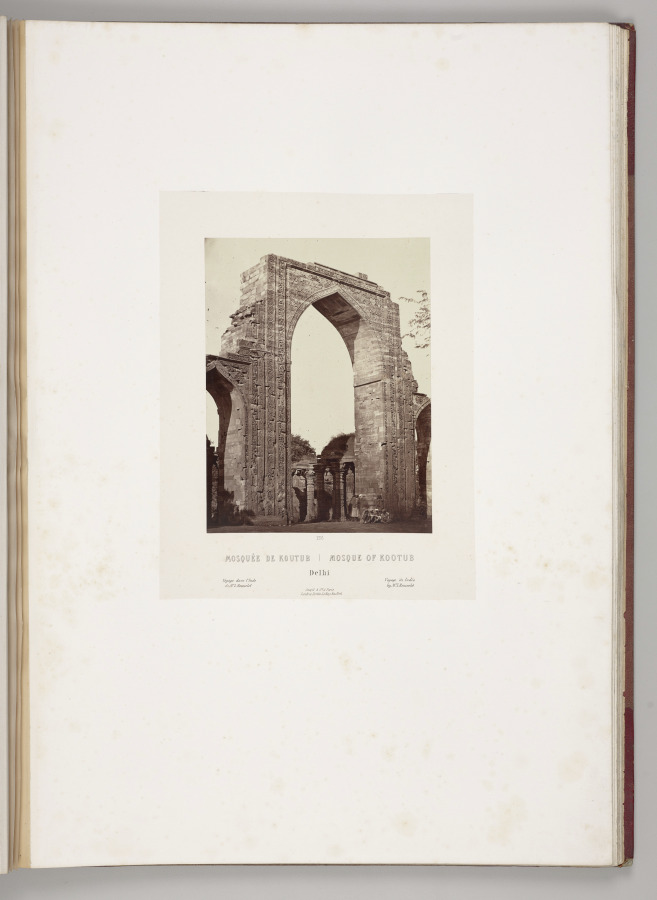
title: Mosque of Kootub, Delhi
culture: France, 19th century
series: India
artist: Louis-Théophile Marie Rousselet (French, 1845–1929)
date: 1865–68, published 1869–70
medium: Albumen print from glass plate negative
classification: Photograph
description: Concerned that his drawings did not do justice to the splendor of India’s monuments, Rousselet learned photography in India that year, a remarkable accomplishment. He proved to be a talented photographer with a sophisticated sense of composition. The scenes in this volume sweep across sites of Sultanate, Rajput, and Mughal power in northern India, from the sacred Hindu city of Varanasi on the Ganges River to Alwar in Rajasthan. Also included are several scenes of industry and portraits of Indian rulers.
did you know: Louis Rousselet described himself as a “scientific traveler” when he went to India alone at age 18 in 1863 and stayed into 1868.